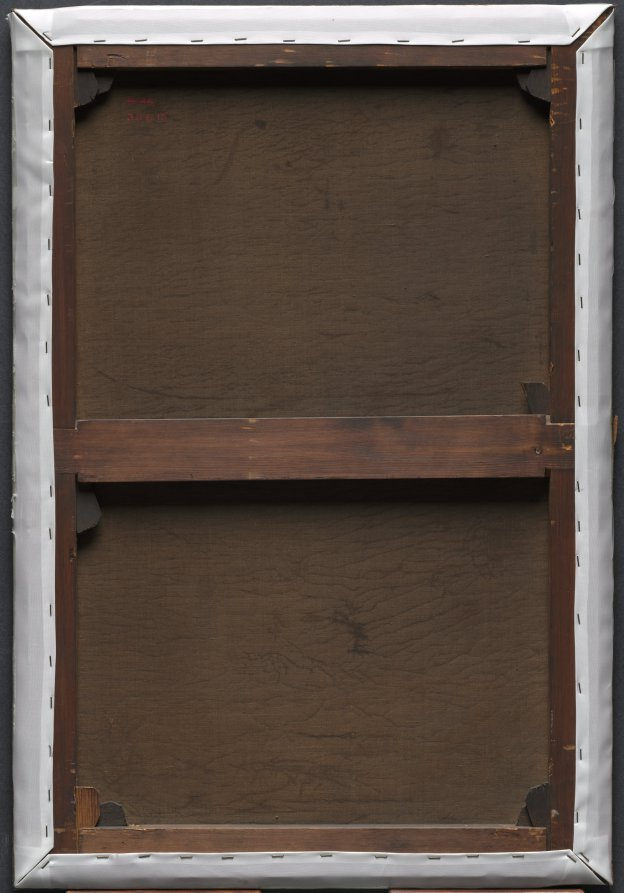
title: The Tired Gleaner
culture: France, 19th century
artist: Jules Breton (French, 1827–1906)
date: 1880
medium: oil on fabric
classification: Painting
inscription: Signed in black paint lower right corner: Jules Breton 1880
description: Gleaning—or picking up what little grain remains after a wheat field has been harvested—was usually the job of the poor, especially women and children. Breton shows a single gleaner stretching against a backdrop of the setting sun, while behind her others still labor in the field. Her bare feet and worn, simple clothing immediately identify her as a peasant. At the same time, however, her expansive gesture and the subdued tones of her skin and clothes link her to the surrounding landscape, both visually and symbolically. This painting not only suggests the hardships of peasant life, but also the grand link between humanity and the land. Like many of his successful contemporaries, Breton met demand for his paintings by copying and making variations of his own works. This picture is similar to a larger, more famous painting that was exhibited in the Paris Salon of 1880. The Cleveland collector Hinman H. Hurlbut, who bought this canvas from the artist, probably commissioned Breton to make this smaller variation of the larger painting.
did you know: Breton felt a sense of connection with peasant life, growing up in a small village of rural workers; however, his father's standing as a property manager to a duke allowed Breton to receive a classical arts education.